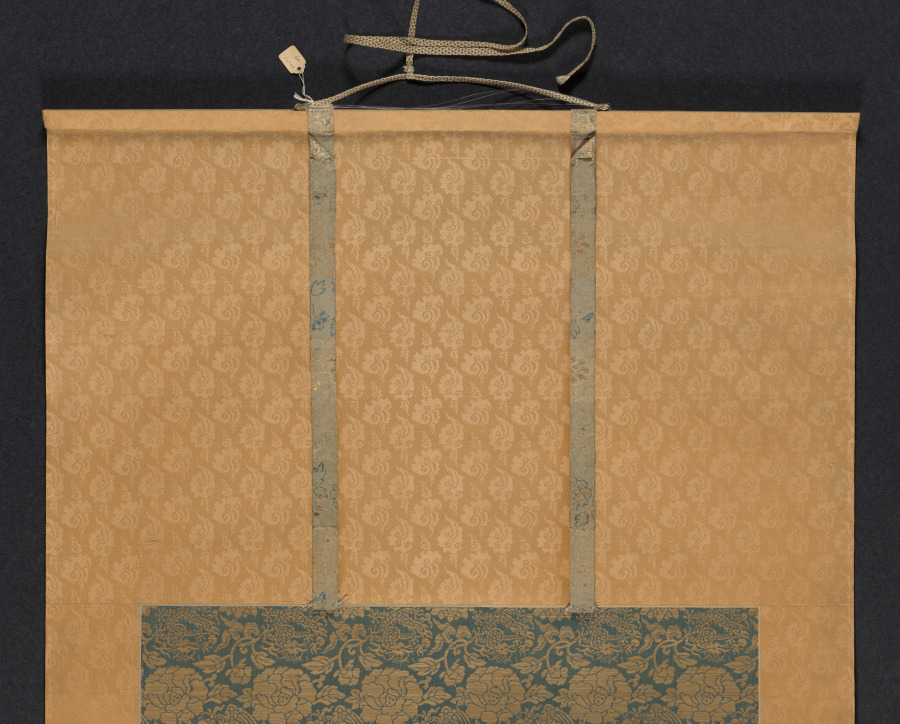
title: Samantabhadra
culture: China, Southern Song dynasty (1127-1279)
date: 1100s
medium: hanging scroll; ink and color on silk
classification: Painting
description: In the last chapter of the Lotus Sutra, one of the principal Buddhist texts, the great Bodhisattva Samantabhadra is described advancing to earth, riding on a six-tusked elephant, and proclaiming himself protector of the faithful. More frequently, he is shown with Bodhisattva Manjusri as the attendants of Shakyamuni (the historical Buddha). This scroll is probably the left panel in a triptych (group of three paintings) portraying these deities.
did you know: Samantabhadra holds a lotus with a sutra on top of the blossom.